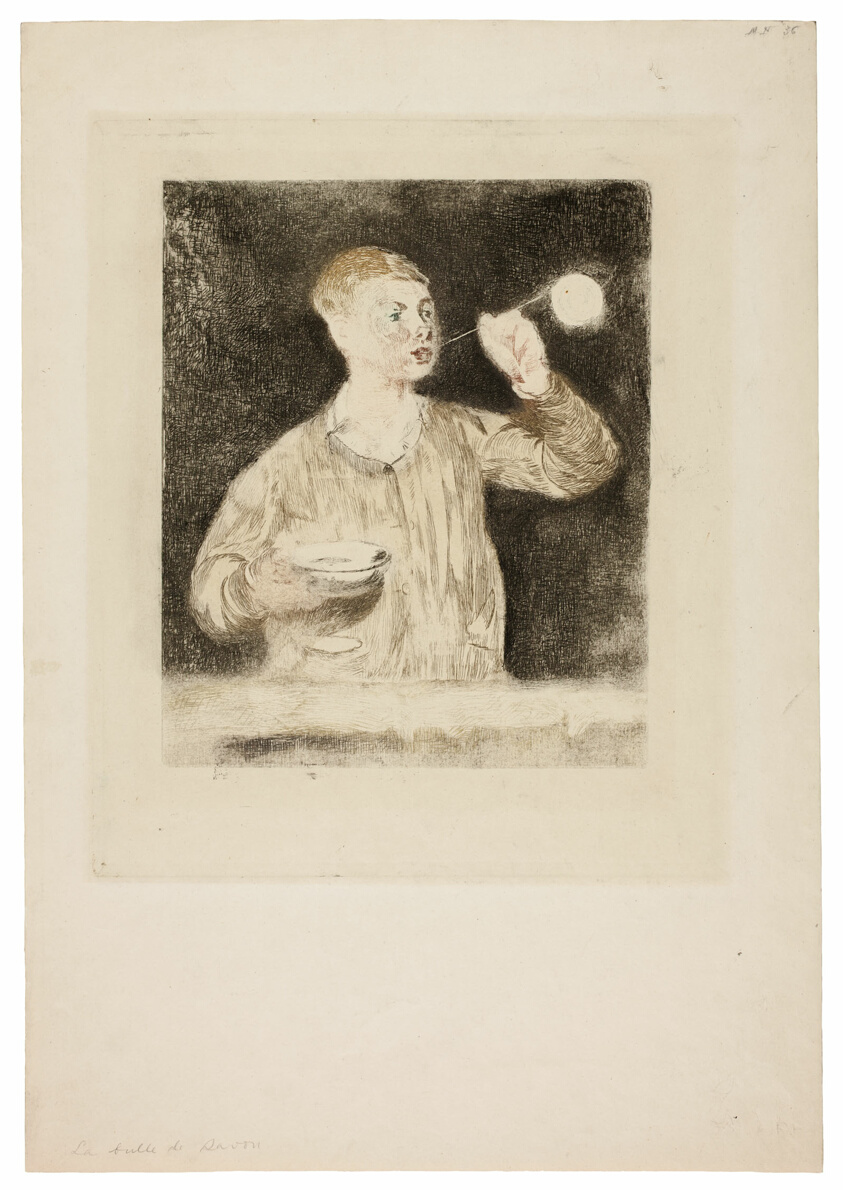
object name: Print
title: Boy Blowing Soap Bubbles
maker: Édouard Manet (French, 1832-1883); printed by Henri Charles Guérard (French, 1846-1897)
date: late 1868/early 1869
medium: Etching and aquatint, with roulette, with color applied à la poupée, on cream wove paper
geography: France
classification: etching; print; prints and drawing